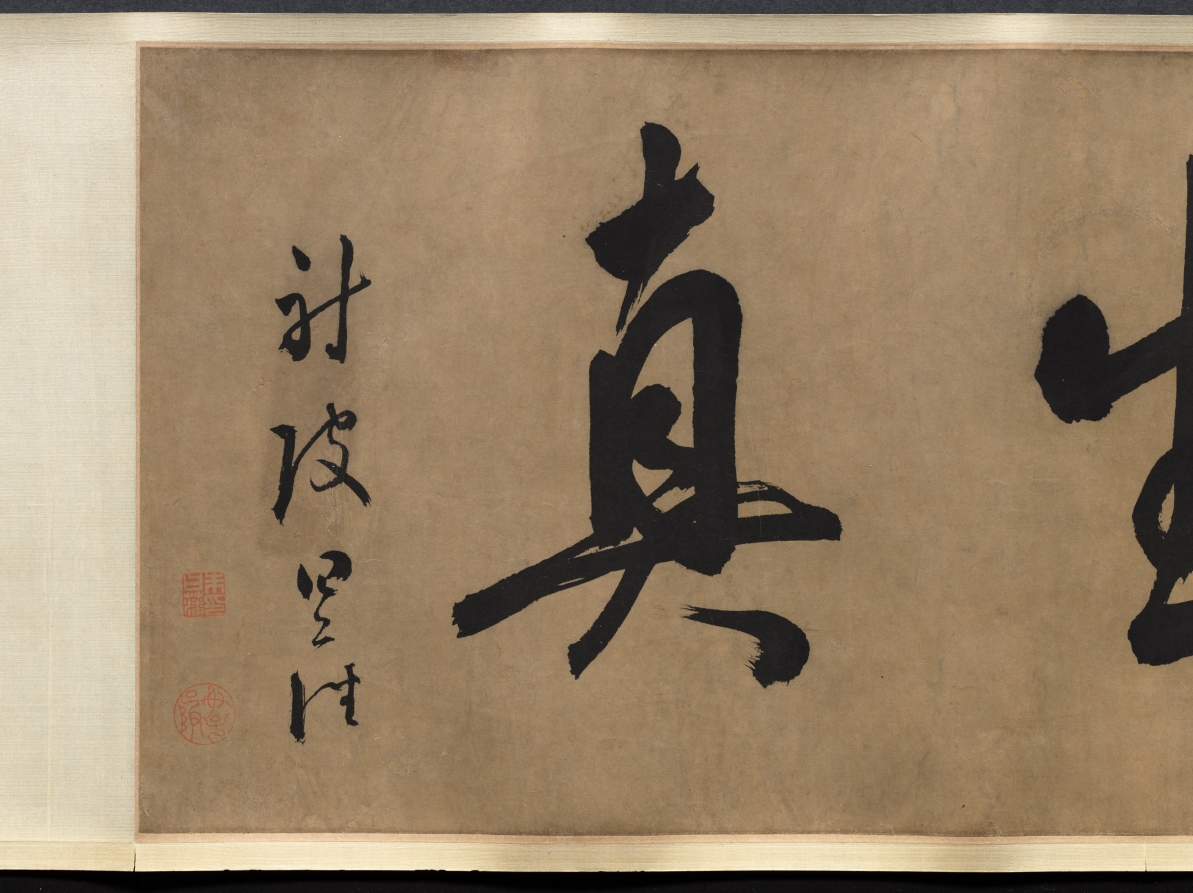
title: Insects and Flowers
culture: China, Qing dynasty (1644-1911) or Republican period (1912-49)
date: c. 1900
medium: Handscroll, ink and color on paper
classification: Painting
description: More than 26 feet long, this scroll presents insects, reptiles, and plants in delicate brushwork and pale colors, referring in style to earlier Southern Song dynasty (1127–1279) bird-and-flower paintings. Upon closer inspection, ants dismember a butterfly and reptiles wait to ambush their prey. An inscription at the end of the painting gives us an idea of its meaning: Attributed to the Qing dynasty scholar Zhang Xigeng (張錫庚, 1801–1861), the inscriber relates the work to an earlier painting by Qian Xuan (錢選, c. 1235–before 1307) and further suggests that the painting may allude to the relentlessness of natural selection. By drawing a parallel to tumultuous episodes in Chinese history, the writer might even hint at the domestic rebellions and the aggression of Western powers against China in his lifetime, particularly the Opium Wars (1839–60).